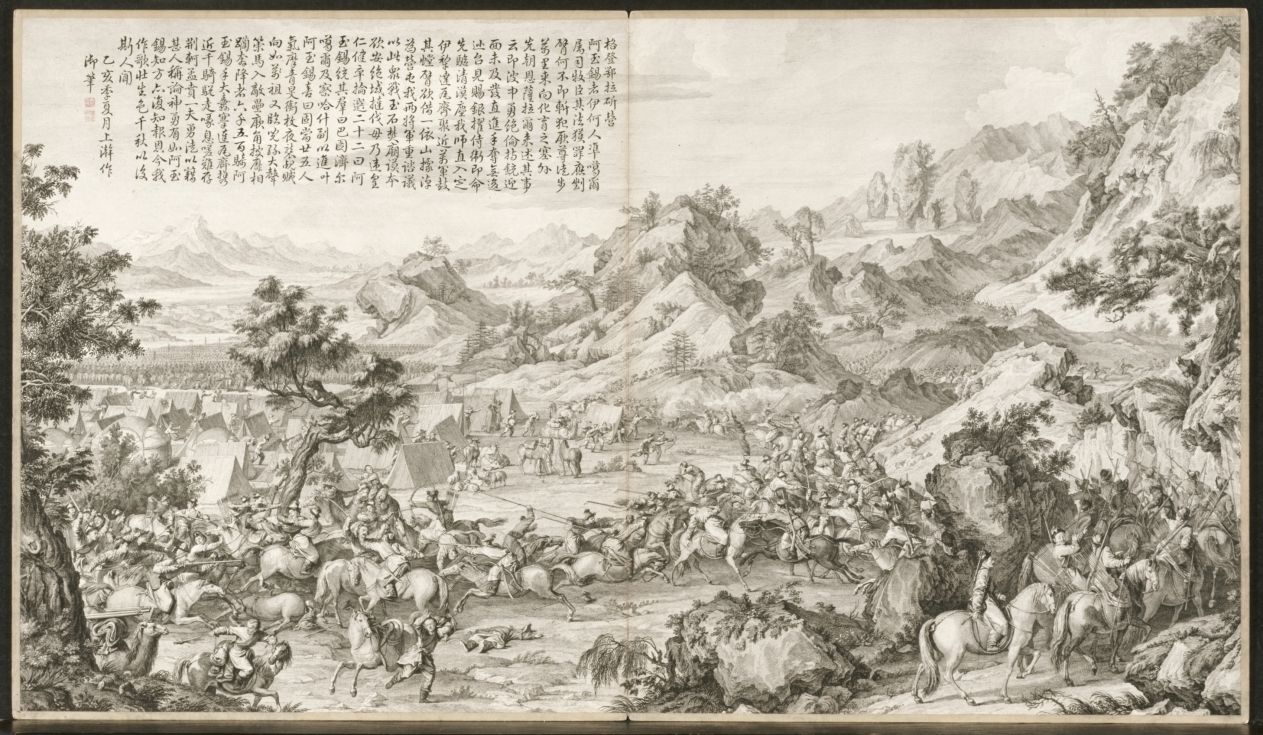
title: Attacking the Camp at Gatan Ola: from Battle Scenes of the Quelling of Rebellions in the Western Region, with Imperial Poems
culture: China, Qing dynasty (1644–1911), Qianlong reign (1736–95)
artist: Giuseppe Castiglione (Italian, 1688–1766)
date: c. 1765–74; poem dated 1755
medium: etching, mounted in album form, 16 leaves plus two additional leaves of inscriptions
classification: Print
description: This set of etchings was commissioned by Emperor Qianlong to record in pictorial terms the courage of his generals and soldiers in quelling the rebellions in the Western Regions. Qianlong added his own poem to each of the etchings, indicating his appreciation and pride in this demonstration of military might. "Western Regions" refers to the present-day Xingjiang province, often described in Western writing as "Central Asia."